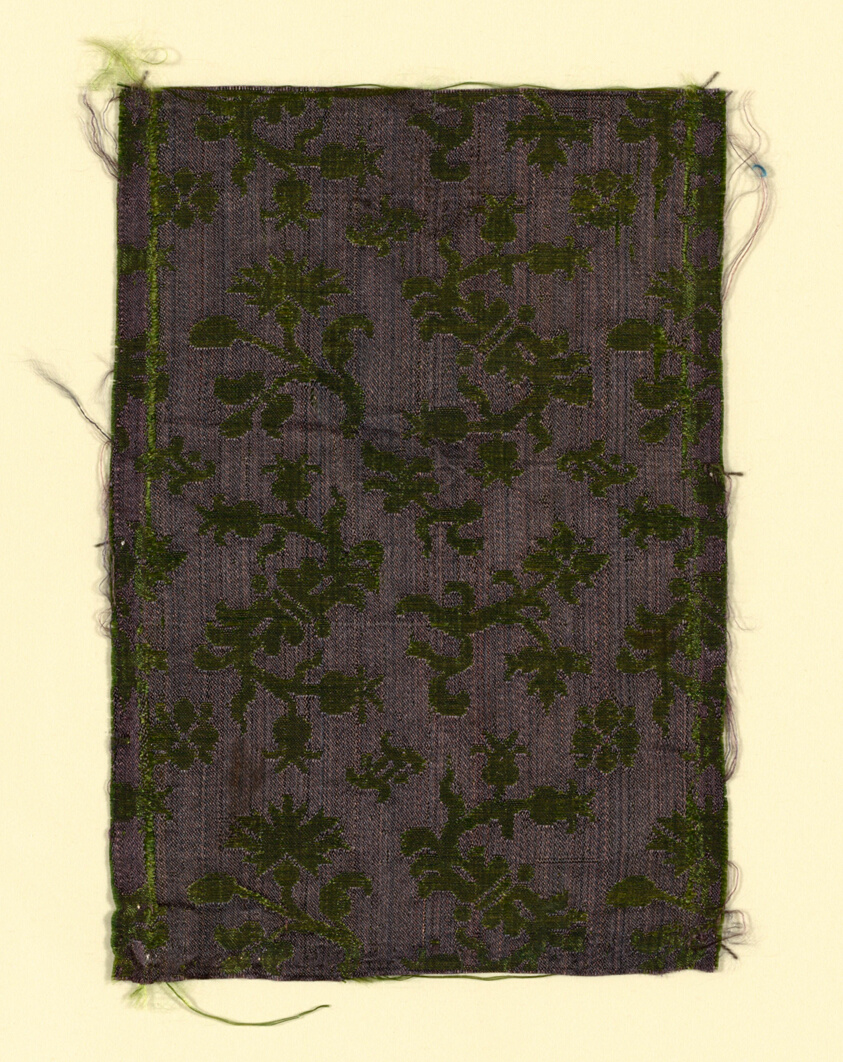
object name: Textile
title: Fragment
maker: Italy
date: 1601/50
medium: Silk, warp-float faced satin weave self-patterned by seversing of faces (damask)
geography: Italy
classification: textile; weaving